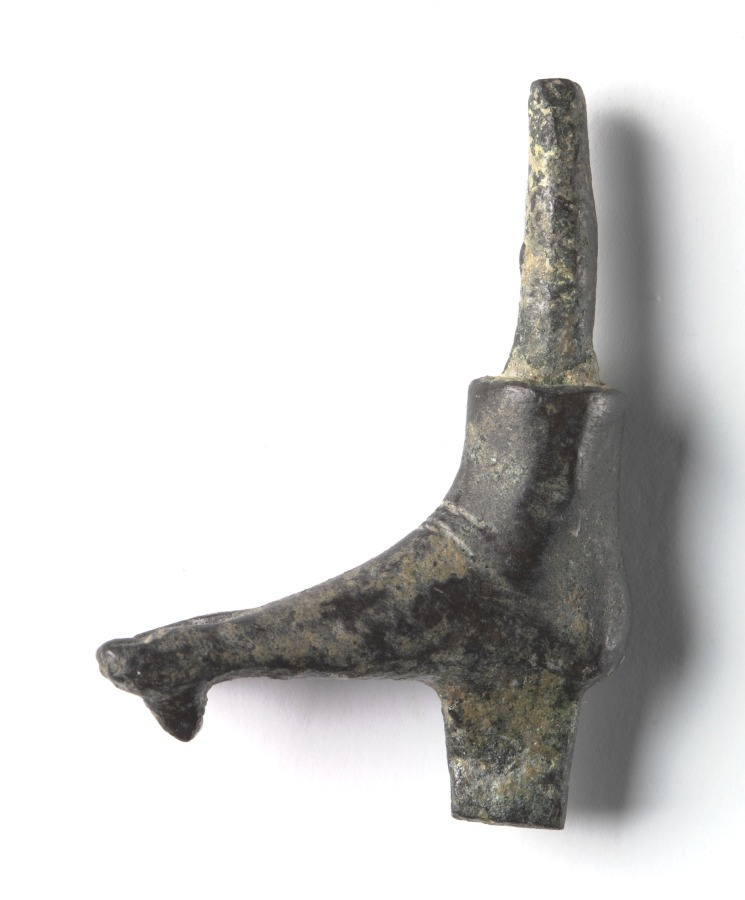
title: Bronze Mount from a "Shawabty Bundle": Right Foot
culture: Egypt, Thebes, Wadi Qubbanet el-Qirud, New Kingdom (1540–1069 BCE), Dynasties 18–19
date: c. 1336–1256 BCE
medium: bronze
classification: Funerary Equipment